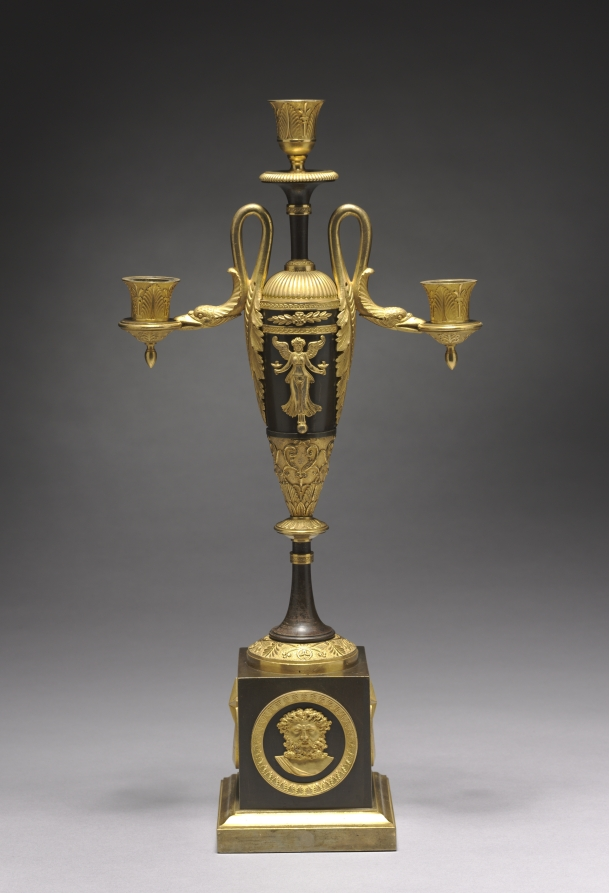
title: Candelabrum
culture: France, late 18th-early 19th century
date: c. 1800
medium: gilt and patinated metal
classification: Furniture and woodwork